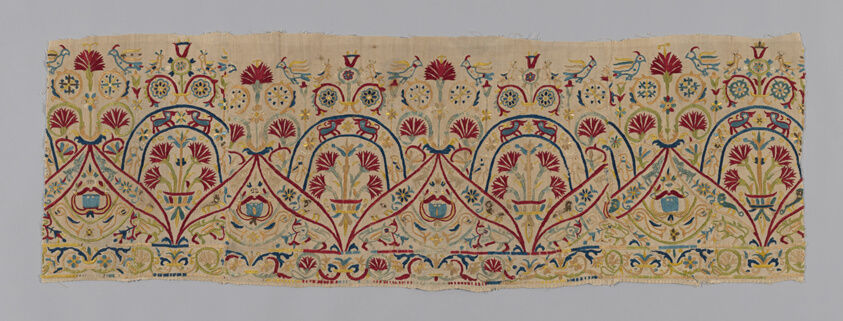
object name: Textile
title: Border (For a Skirt)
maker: Greece, Crete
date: 18th century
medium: Cotton, plain weave; embroidered with silk in back, chain, Cretan, closed herringbone, open chain, overcast, Roumanian, and satin stitches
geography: Kríti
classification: textile; needlework (visual works)